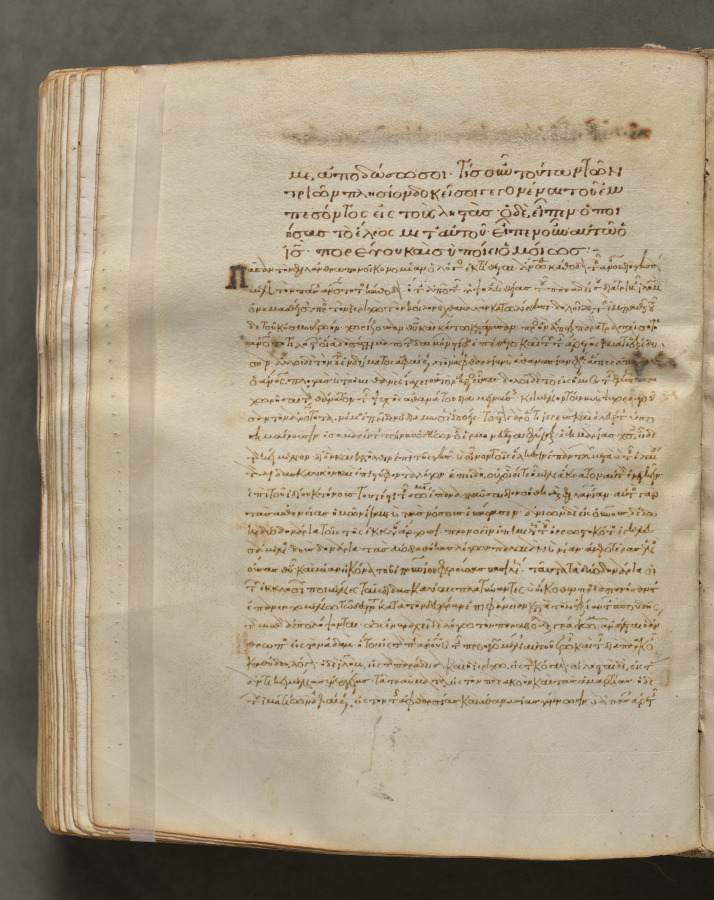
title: Text, folio 256 (verso), from a Gospel Book with Commentaries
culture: Byzantium, Constantinople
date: c. 1000–1100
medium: ink, tempera, and gold on vellum; leather binding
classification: Bound Volume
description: Each of the four gospels in this book opens on a page with brilliantly illuminated borders depicting the author of the text as well as birds—principally peacocks, symbols of the immortality of the soul—and fountains, representing the fountain of life and the salvation of the soul. This volume consists of 428 leaves with texts in Greek. Its level of sophistication suggests that it was probably written and decorated in a monastery in Constantinople.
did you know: Gospel books were carried in procession through Byzantine churches.